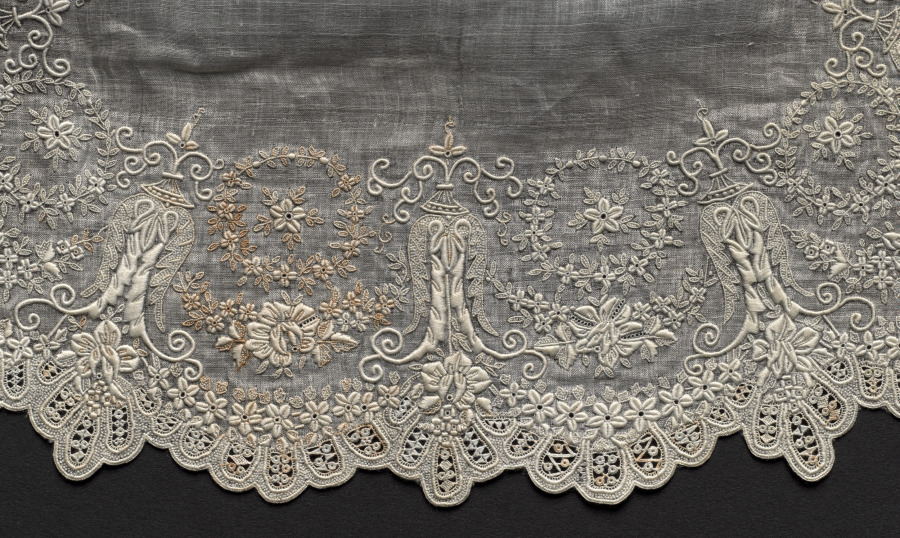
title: Embroidered Handkerchief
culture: France or Switzerland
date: 1800s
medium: Plain weave linen, embroidered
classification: Embroidery